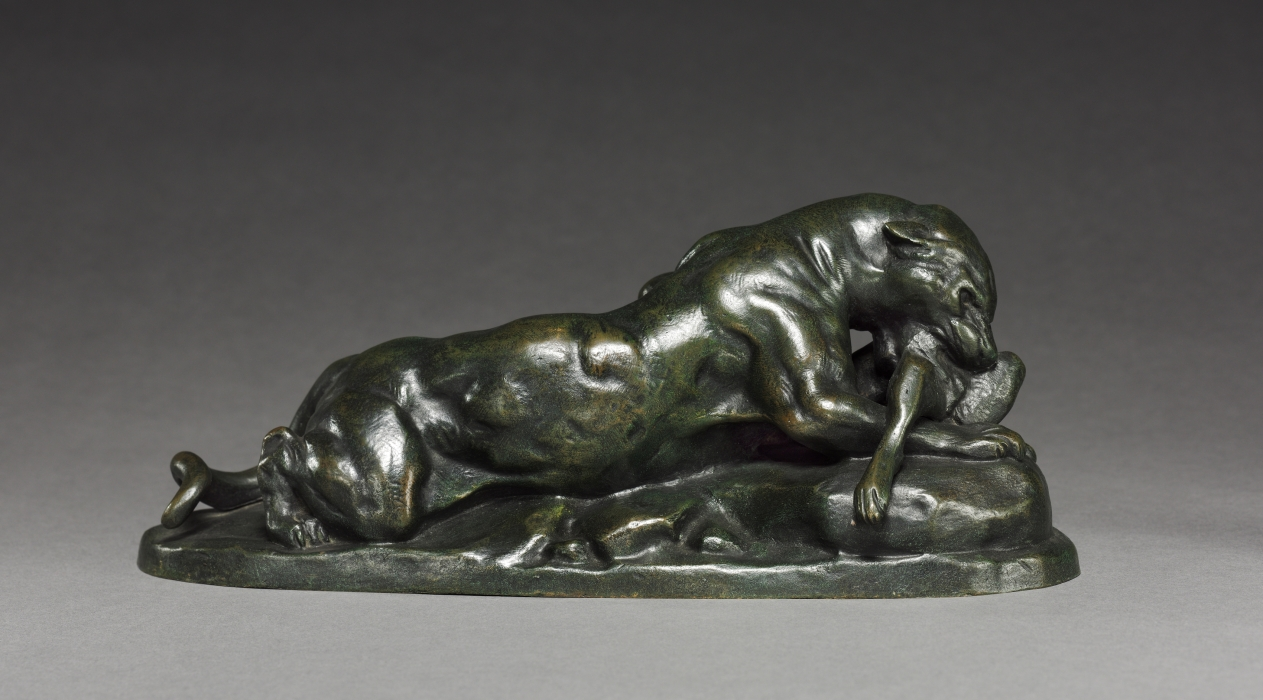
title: Jaguar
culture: France, 19th century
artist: Antoine-Louis Barye (French, 1796–1875)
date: c. 1850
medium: bronze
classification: Sculpture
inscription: On base, back of left hind leg: (L?). Barye"